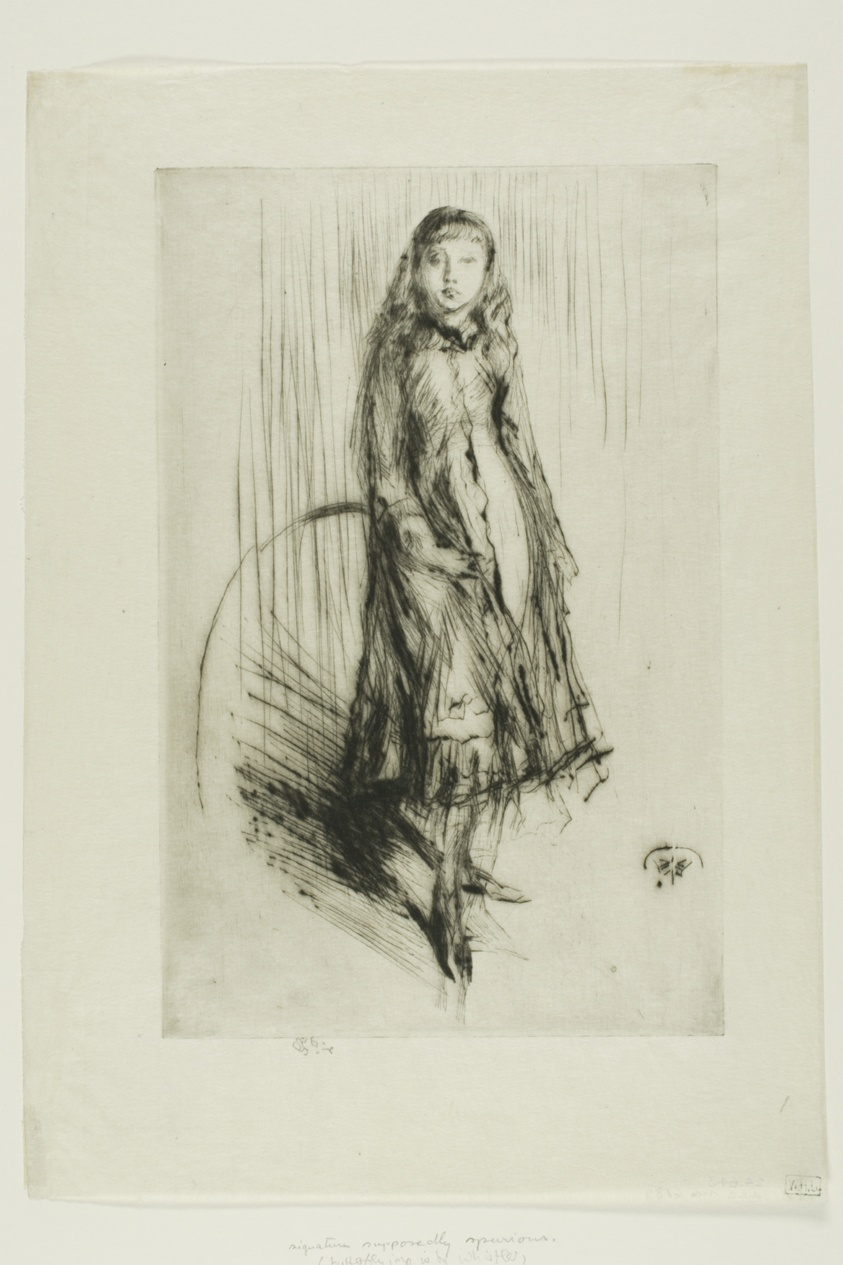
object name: Print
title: Florence Leyland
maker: James McNeill Whistler (American, 1834-1903)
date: 1874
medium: Drypoint in black ink on cream Japanese paper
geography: United States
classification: drypoint; print; prints and drawing; paper